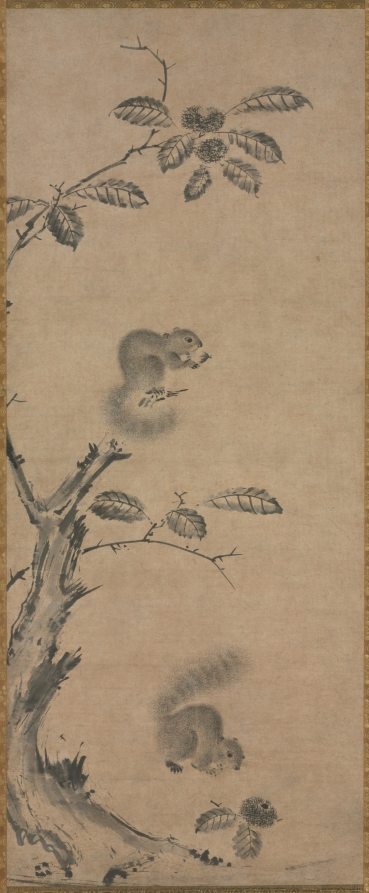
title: Squirrels on the Chestnut Tree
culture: China, Yuan dynasty (1271-1368)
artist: Ge Shuying (Chinese, active 1300s)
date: 1300s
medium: Hanging scroll; ink on paper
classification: Painting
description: One squirrel perches on a branch nibbling a chestnut, while the other on ground is approaching a fallen chestnut. The painter used fine, short staccato strokes to simulate the animal’s soft fur, while the tree is depicted with broader wet strokes in a rougher manner. Ge Shuying is known for his depictions of squirrels in a monochrome style characterized by crisp, decisive brushstrokes. He may have been a Chan (Zen) priest-painter, or perhaps a Daoist painter, active in the Hangzhou region of eastern China. From there his works spread to Japan, where squirrel paintings gained the attention of Japanese collectors.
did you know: Dr. Ju-hsi Chou argues that Yongtian and Songtian were different, but related (father-son, master-pupil, or brothers) painters of squirrels. Ge was apparently their family name. A Tokyo National Museum squirrel painting signed Songtian Shanren (松田山人) has a seal giving the artist's formal name as Ge Shuying (葛淑英).